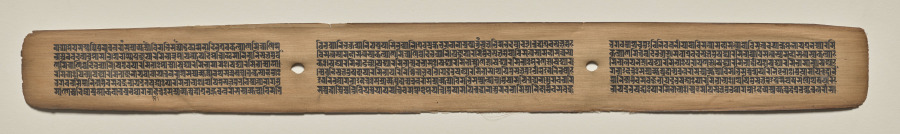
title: Text, Folio 140 (recto), from a Manuscript of the Perfection of Wisdom in Eight Thousand Lines (Ashtasahasrika Prajnaparamita-sutra)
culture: Eastern India, Bihar, Vikramashila Monastery. Painting: Nepal, Kathmandu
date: Sunday, September 14, 1119 (year 239 of the Newar Samvat in the month of Ashvina)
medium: gum tempera and ink on palm leaves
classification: Painting